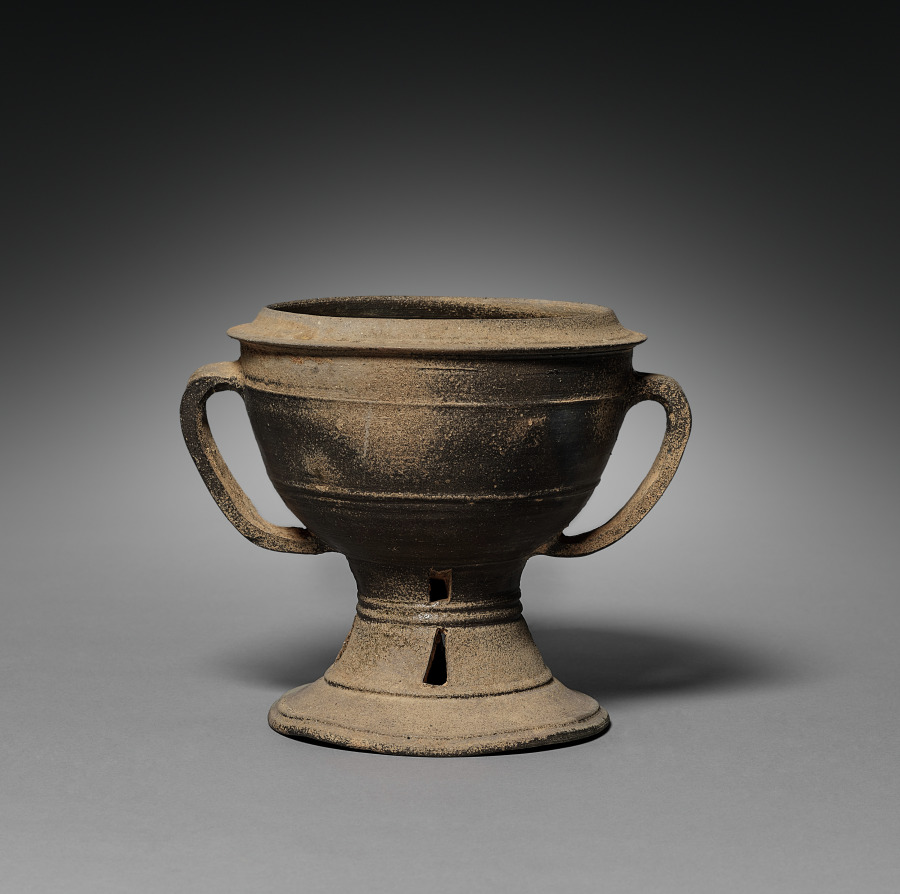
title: Lidded Cup with Strap Handles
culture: Korea, Gaya period (42–562 CE)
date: 300s–400s CE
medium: stoneware with natural ash glaze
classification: Ceramic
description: Pottery vessels with a footed stand such as this one is the earliest known high-fired ware. Its gray color is the result of the reduction of oxygen in the closed kiln chamber. Footed vessels were not for everyday usage, but rather served to present offerings to the deceased.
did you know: A series of triangular cutouts shown on the bottom are standard features of Kaya pottery.